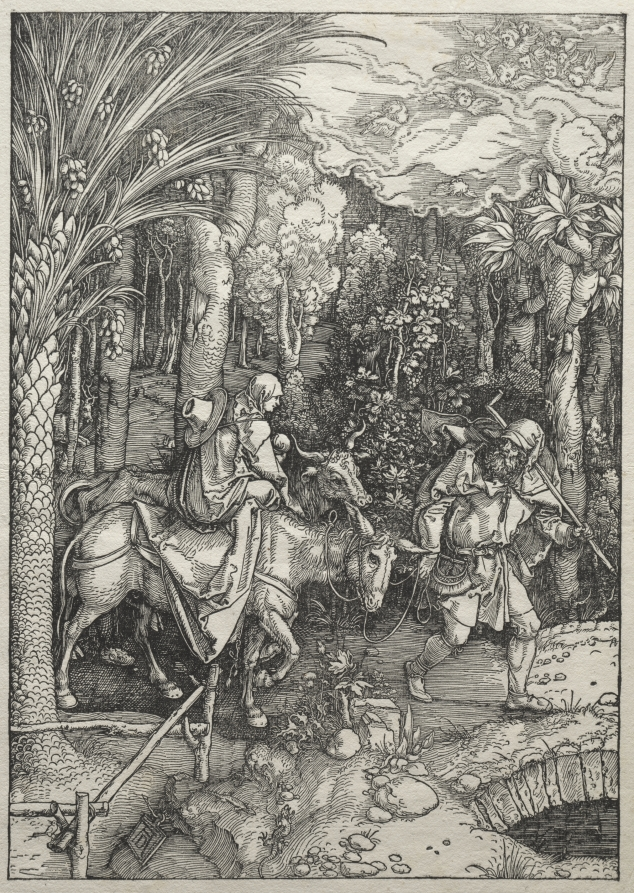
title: Life of the Virgin: Flight into Egypt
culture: Germany, early 16th Century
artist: Albrecht Dürer (German, 1471–1528)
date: 1504–1505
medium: woodcut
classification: Print